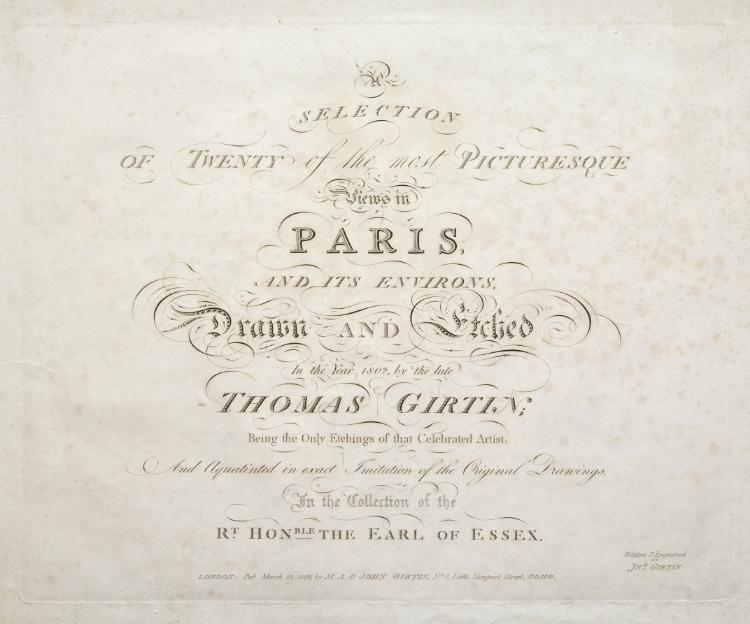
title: A Selection of Twenty of the Most Picturesque Views in Paris, And its Environs: Title Page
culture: England, 19th century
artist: John Girtin (British)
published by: M.A. & John Girtin, London 1803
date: 1803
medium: engraving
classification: Print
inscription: in plate: bottom, center: London: Pub. March 22. 1803 by M.A. and John Girtin, No. 1 Little Newport Street, Soho; bottom right corner: Written & Engraved by Jno. Girtin